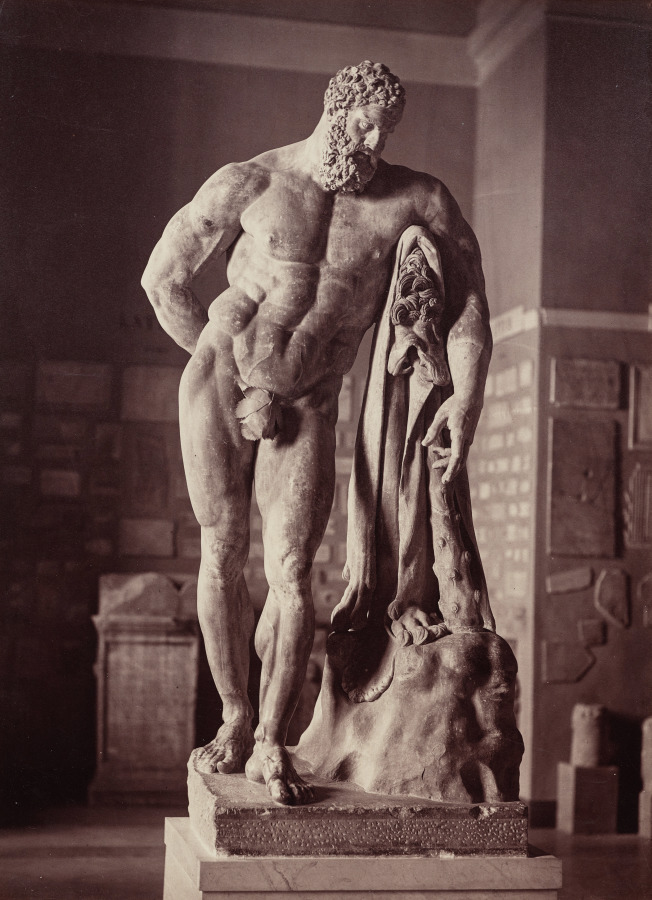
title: Farnese Hercules, Museum of Naples, Italy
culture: Italy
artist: Giorgio Sommer (Italian, 1834–1914)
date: c. 1860s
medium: albumen print from collodion negative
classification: Photograph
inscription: Imprinted in grey ink on recto: "No. 4402. Ercole farnese (Museo Napoli)"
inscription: Written in pencil on verso: "PH/ 6091"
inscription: Written in pencil on verso: "IT-232/ Sommer"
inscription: Written in pencil on verso: "2000-"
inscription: Written in pencil on verso: "AD 135 / 349 (19)/ 5183 / 254"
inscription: Stamped in black ink on verso: "I.C.(cirlced)"